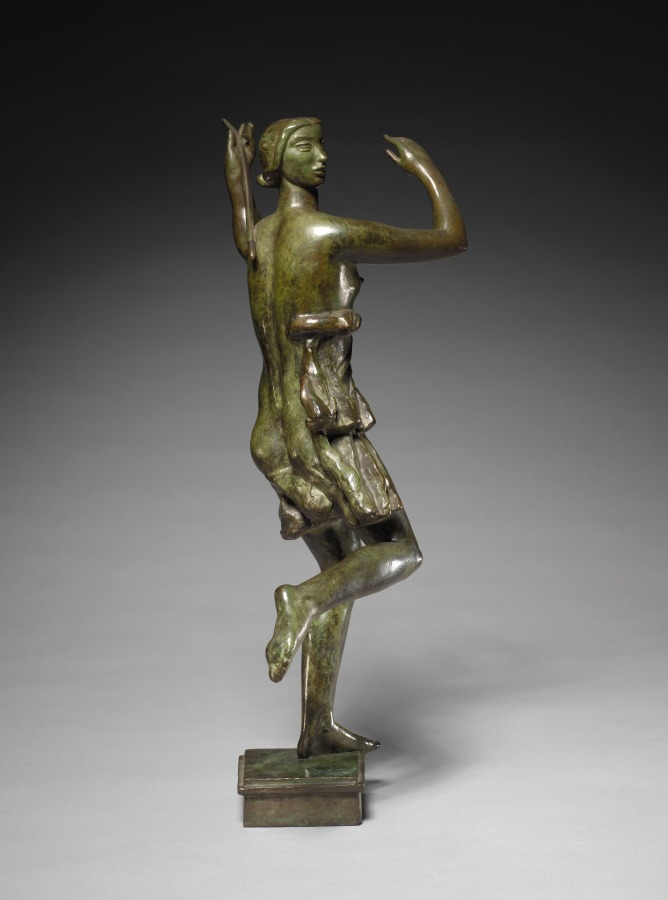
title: Diana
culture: Sweden, 20th century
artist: Carl Milles (Swedish, 1875–1955)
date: 1927–1928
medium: bronze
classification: Sculpture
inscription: Signed on back of base: "Milles"